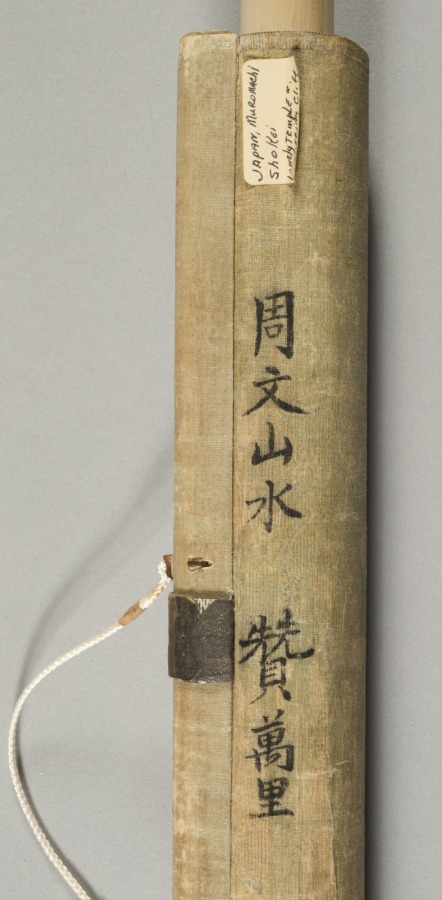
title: Lonely Temple and Towering Cliff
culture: Japan, Muromachi period (1392–1573)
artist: circle of Kenkō Shōkei (Japanese, active 1478–1506)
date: c. 1480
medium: hanging scroll; ink and slight color on paper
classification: Painting